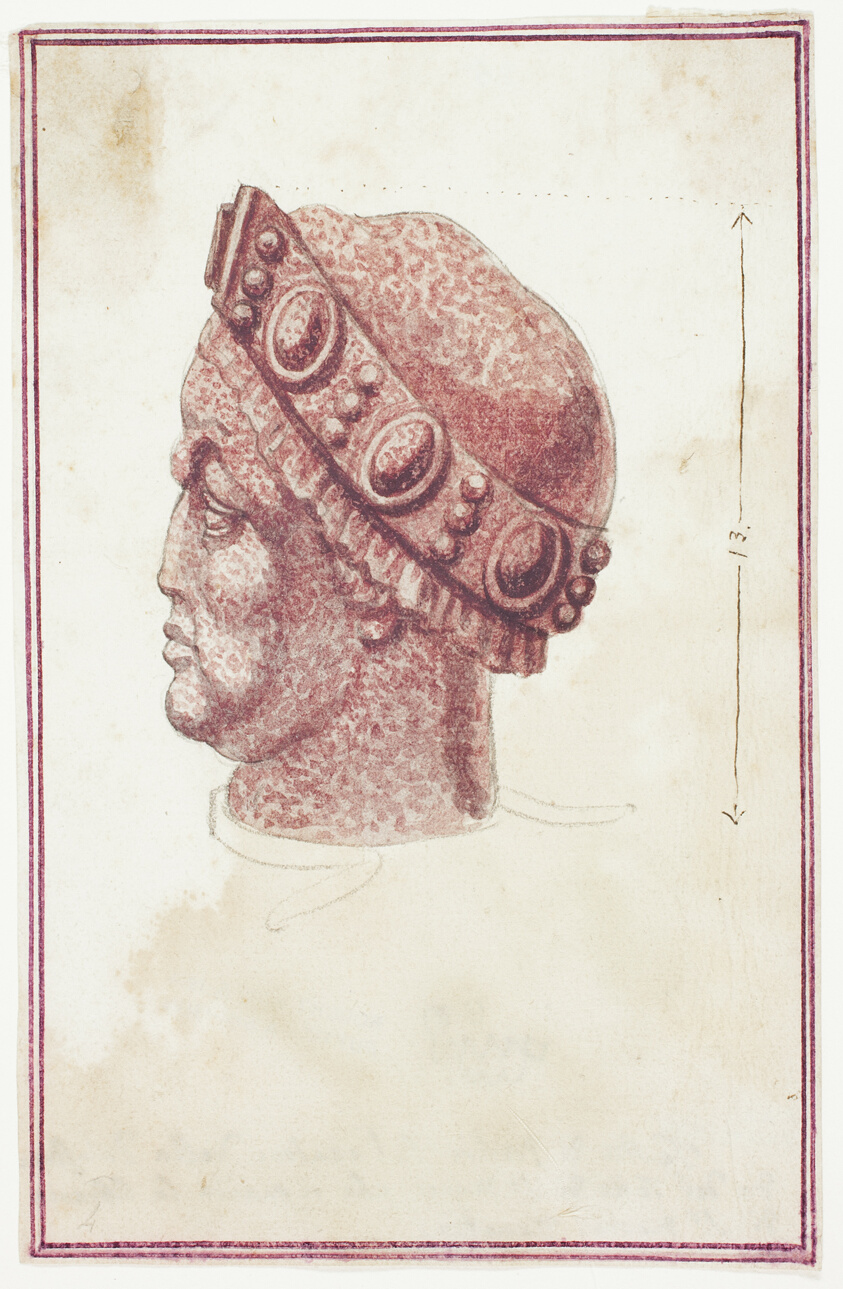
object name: Drawing and Watercolor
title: Porphyry Head (San Marco, Venice)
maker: Giuseppe Grisoni (Italian, born Flanders, 1699-1769)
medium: Gouache over black chalk, with pen and brown ink, on ivory laid paper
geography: Flanders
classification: gouache; watercolor; drawings (visual works); prints and drawing